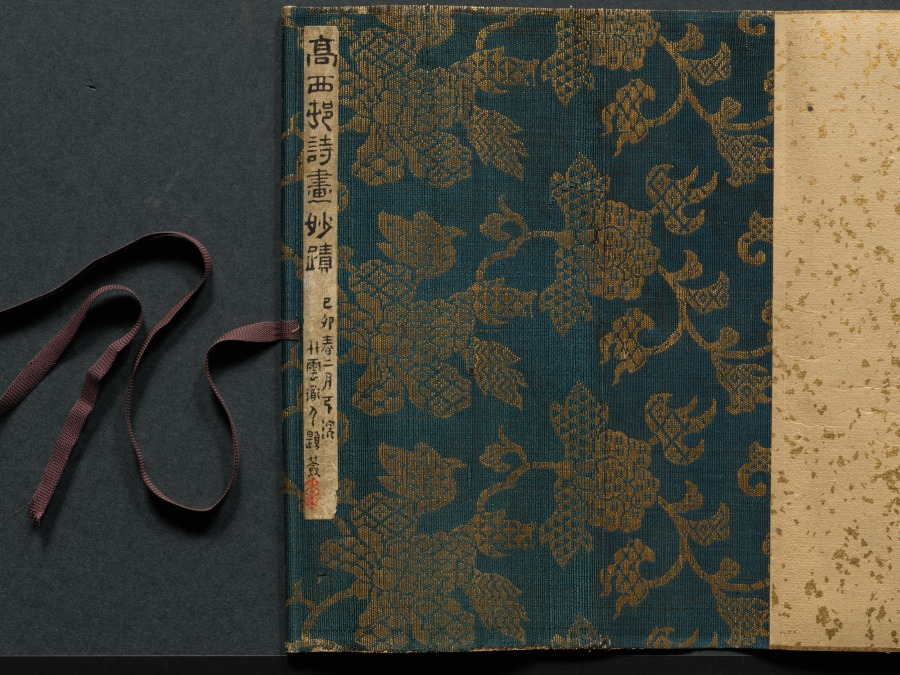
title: Plum Blossoms and Peonies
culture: China, Qing dynasty (1644-1911)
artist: Gao Fenghan (Chinese, 1683–1749)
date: 1741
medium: handscroll, ink on paper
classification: Painting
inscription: Artist's 2 inscriptions and 9 seals (the painting of Peonies with the artist's colophon and the colophon by Hou Chia-fan are on a single sheet of paper). Artist's inscription and 2 seals (Plum Blossoms): [seal] Ts'ai-yün. After finishing writing my colophon, I unrolled the painting to take another look, and it now seems that the composition here should have moved to the later part of the scroll. If that is the case, then the "Cool Beauty" [prunus] of the Solitary Hill is after all unable to take precedence over the "King of Flowers" [peony]. A laugh. Lao-fou inscribed. [seal] Feng-han. Artist's colophon (Plum Blossoms): [3 seals] Tun; Yen-yün-kung-yang, Hou-shang-tso-sheng. A few days after I painted this scroll for Shui- hsien [Yüeh Meng-yüan], the plum blossoms were in full bloom at his residence. He invited me over to enjoy them together for a long while, and I composed two additional poems and wrote them down here for his criticism. [Poems on the colophon are not translated.] First month, twenty-first day, your junior, Kao Feng-han of Nan-fou drafted this with the left hand. [seal] Feng-han. Artist's inscription and 4 seals (Peonies): Brushed with the left hand in the hsin-yu year [1741]. [seal] Yu-hsi. [3 seals at end of painting] Hou-shang-tso-sheng; Yen-yün-kung-yang; Shih-tsao-wu. Artist's colophon and seal (Peonies): The imperial concubine from the Yang family loved to dress in red, And from the emperor won the title of Hai-t'ang. But ever since she became the new dream of the moon palace, She changed into rainbow colors, while learning to dance. After I wrote the poem on Looking for Plum Blossoms in the Teng-wei Mountains, I attached to it a few branches of prunus, some bamboo tips and a piece of rock, with a scattering of green [moss] here and there to fill up the scroll. Unexpectedly, my playful fascination [with these subjects] was still not quite satisfied, so I made up these amorous ideas and romantic images [of the peony], to follow the footsteps of the fair lady of the Ku-hsieh Mountain [prunus]. Furthermore, I picked out one poem to be my vanguard. Perhaps such luminosity of wealth and power will be enough to overwhelm the poor fellows, and [they] will not mind the comparatively short length [of paper] assigned to it. Amusingly inscribed. Please correct me again. To Shui-hsien, my learned senior, your junior Han inscribed again. [seal] Tso-hua [left-handed painting]. 1 additional colophon and 5 additional seals: 1 colophon, dated 1742, and 3 seals of Hou Chia-fan (act. ca. 1742); 1 seal of P'u Ch'üan (20th c.?); 1 seal of Li family (dates unknown).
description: One of the so-called Yangzhou Eccentrics (a group of painters who lived in Yangzhou and were known for their unorthodox art and lifestyle), Gao Fenghan depicts China’s two most loved flowers in full bloom—the “cold beauty,” or plum blossom, in the first section, and the “king of flowers,” or peony, in the second section. Painted in 1741, the year when Gao decided to leave the south and return home to Shandong province in eastern China, this work was likely a token of farewell. His casual brushwork may indicate his mental and physical struggle at the time. After having crippled his right hand in 1737, Gao used his left hand to paint and achieved a crudeness and eccentric style unattainable before.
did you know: In East Asian art, peonies traditionally symbolize prosperity and wealth.